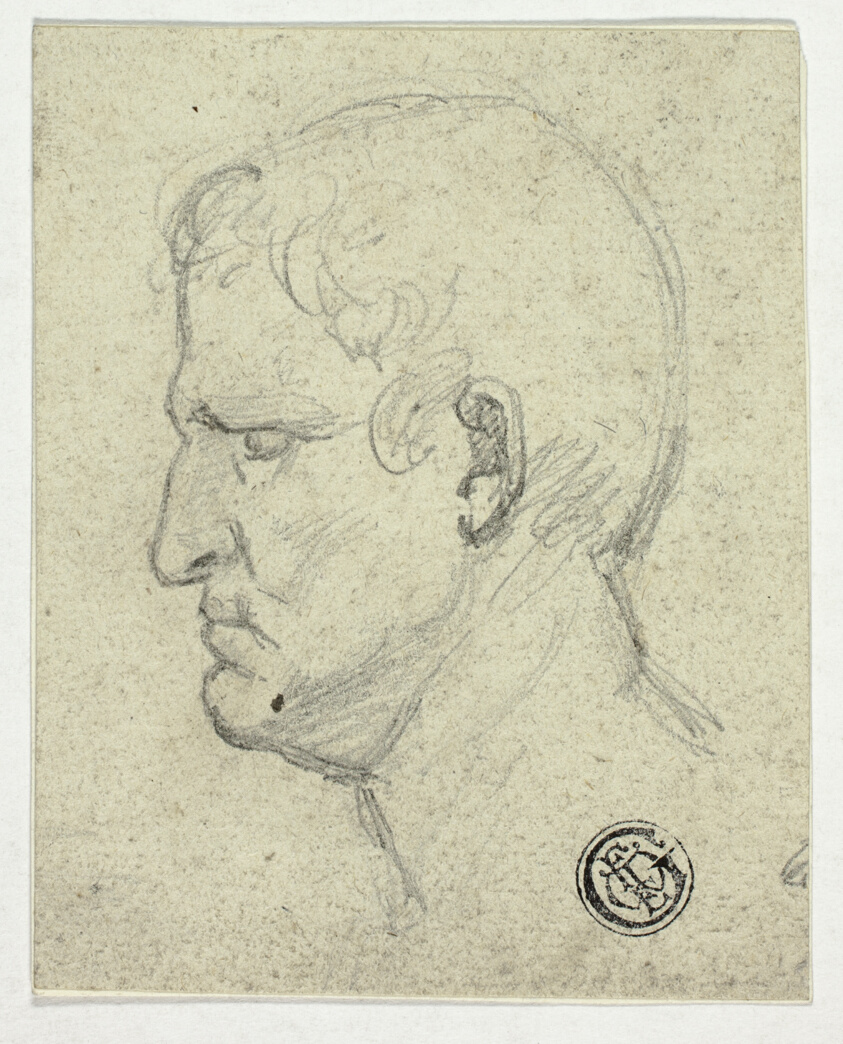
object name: Drawing and Watercolor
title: Head of Roman Emperor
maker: William Mulready (English, born Ireland, 1786-1863)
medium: Graphite on ivory laid paper, tipped on ivory wove paper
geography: Ireland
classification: graphite; drawings (visual works); prints and drawing